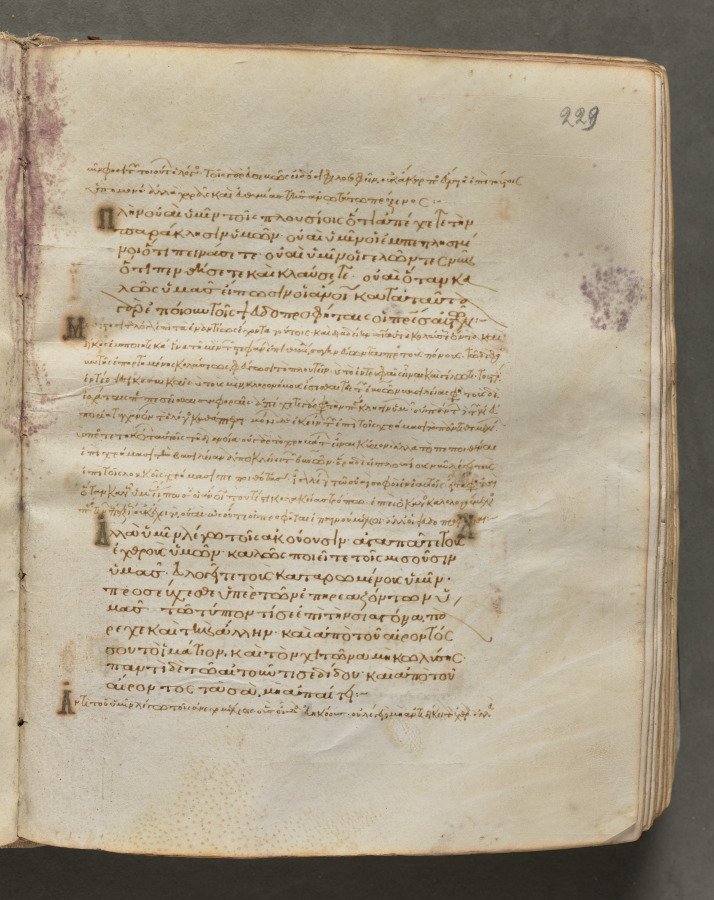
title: Text, folio 229 (recto), from a Gospel Book with Commentaries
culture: Byzantium, Constantinople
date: c. 1000–1100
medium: ink, tempera, and gold on vellum; leather binding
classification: Bound Volume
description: Each of the four gospels in this book opens on a page with brilliantly illuminated borders depicting the author of the text as well as birds-principally peacocks, symbols of the immortality of the soul-and fountains, representing the fountain of life and the salvation of the soul. This volume consists of 428 leaves with texts in Greek. Its level of sophistication suggests that it was probably written and decorated in a monastery in Constantinople.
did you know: Gospel Books were carried in procession through Byzantine churches.